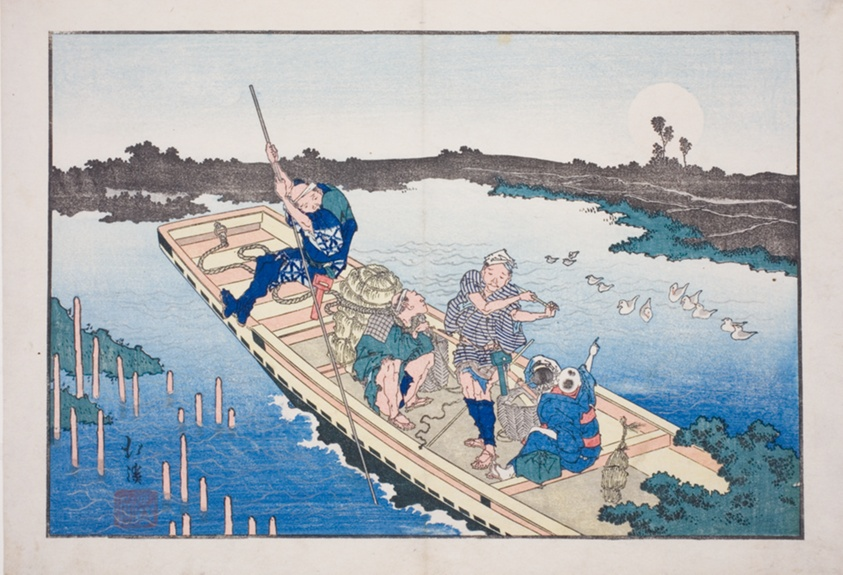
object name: Print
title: Ferry boat crossing the Sumida River, from the album "Friends of the Three Capitals (Santo no tomoe)"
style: Japanese (culture or style)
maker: Totoya Hokkei (Japanese, 1780–1850)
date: 1832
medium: Color woodblock print; double-page illustration from album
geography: Japan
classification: woodblock print; print; asian art